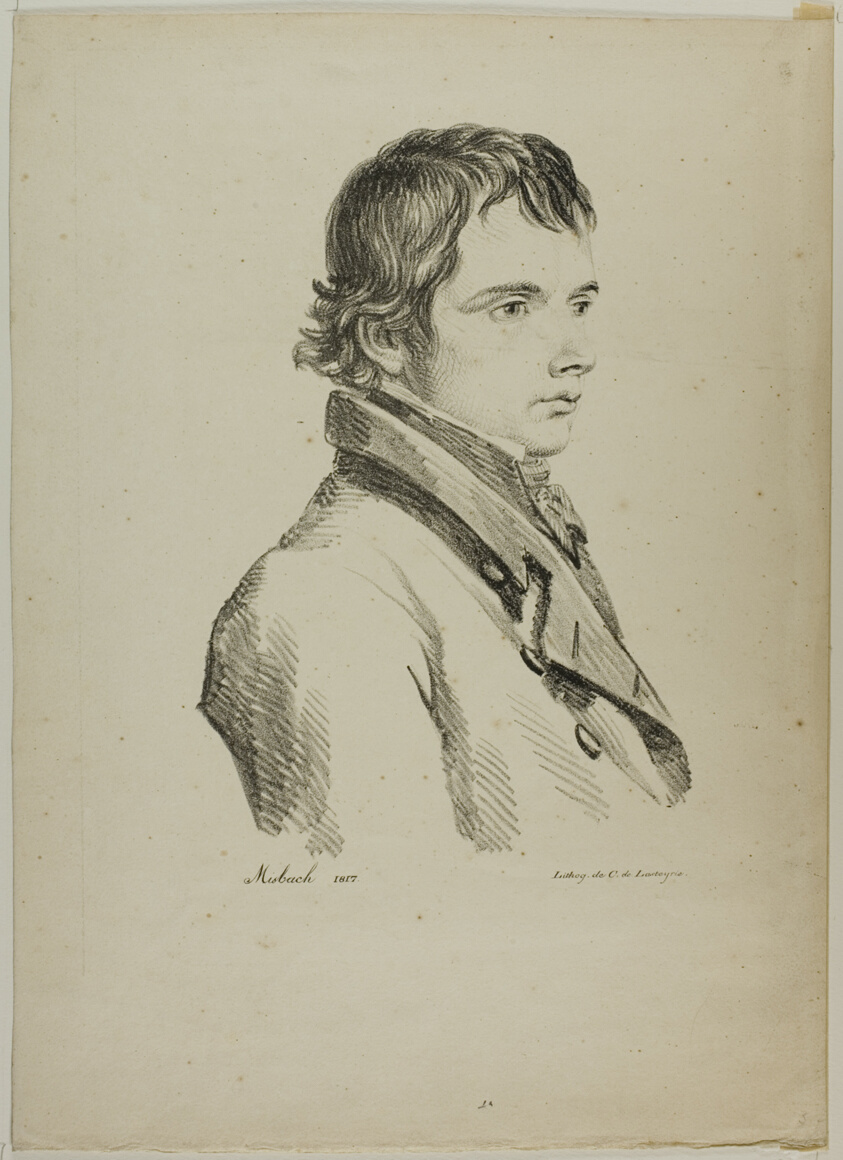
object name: Print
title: Portrait of a Man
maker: Constant Misbach (French, 19th Century); printed by Comte de Charles Philibert Lasteyrie du Saillant (French, 1759-1849)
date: 1817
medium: Lithograph on black on cream wove paper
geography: France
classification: lithograph; print; prints and drawing